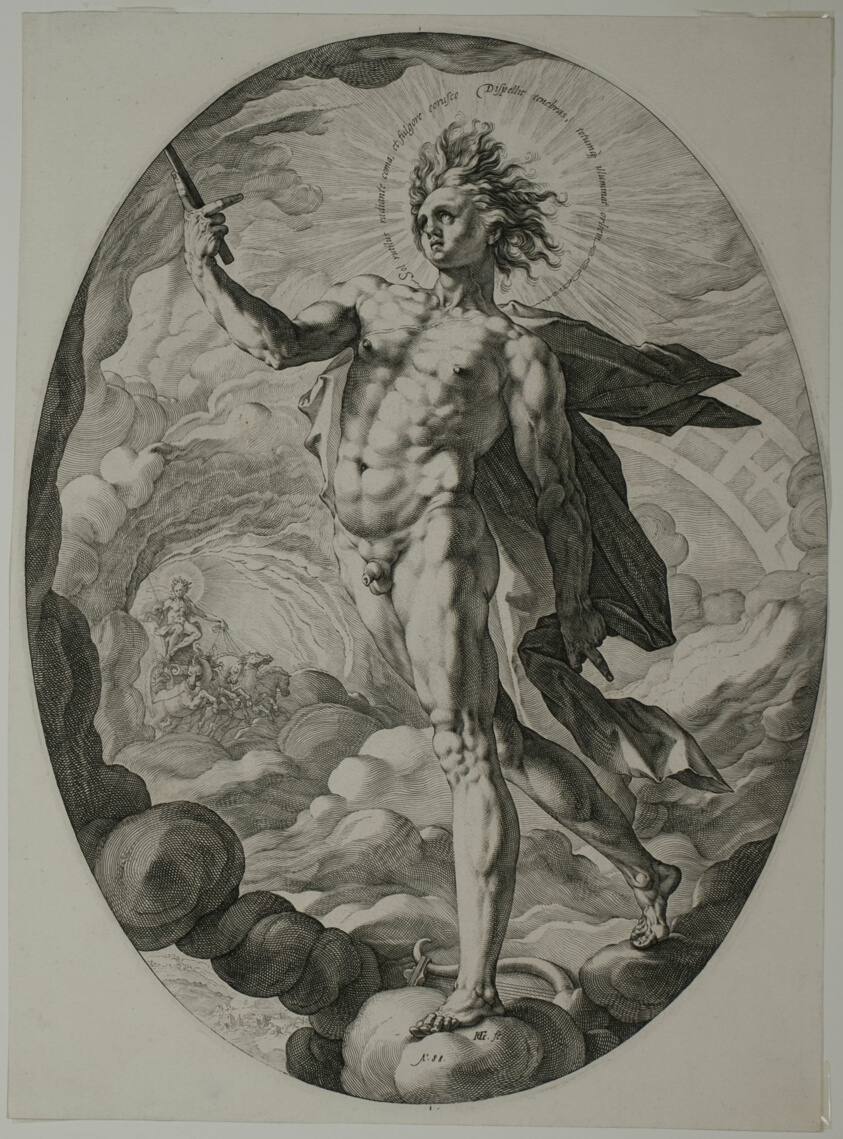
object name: Print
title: Apollo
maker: Hendrick Goltzius (Dutch, 1558-1617)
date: 1588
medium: Engraving in black ink on off-white laid paper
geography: Netherlands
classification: engraving; paper; print; prints and drawing